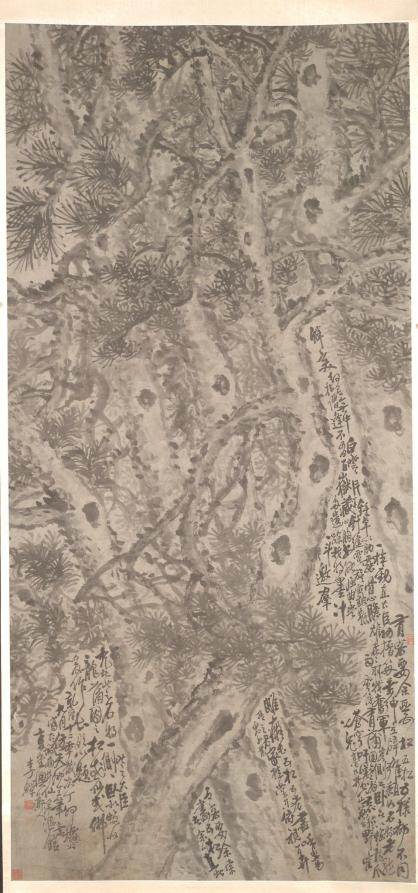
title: Five Pine Trees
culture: China, Qing dynasty (1644–1911), Qianlong reign (1736–95)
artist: Li Shan (Chinese, c. 1686–1762)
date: 1747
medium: Hanging scroll; ink on paper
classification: Painting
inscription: Artist's 5 poems (not translated), inscription, signature, and 4 seals: [seal] Chung-yang. A friend asked me to paint the five pines. I associated the straight pine with a statesman, the bald one with a famous general, the one leaning to one side and the one reclining with dragons, the short round one with foliage like a grass-mat with either an immortal or Buddha. And I composed a long poem as inscription. In autumn, the ninth month of the ting-mao year [1747], the twelfth year of the Ch'ien-lung era, I imitated the style of T'ien-ch'ih sheng [Hsü Wei, 1521-1593], at the Sheng-hsien fu-ou Studio in the southern part of the city. Fu-t'ang, Ao-tao jen, Li Shan. [2 seals] Shan-yin; Tsung-yang. [seal, lower left corner] Fu-t'ang, Li Shan. trans. LYSL/WKH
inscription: 2 additional seals of Cheng Qi 程琦 (1911–1988)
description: Li Shan was born into a family of scholars and officials in Yangzhou. The wealth and status of Li's family assured him an educational and cultural advantage, including his appointment at court. The subjects Li Shan chose to paint—orchids, bamboo, pines, and flowers—reflected his literati background. Five Pine Trees, painted late in his career, is an unconventional work. Rather than having focused on a realistic treatment of the subject, Li created the trees with an interplay of richly modulated strokes, while he utilized a semicursive script among the branches to illustrate the kinship between painting and calligraphy.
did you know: The writing among the branches illustrates the kinship between painting and calligraphy.